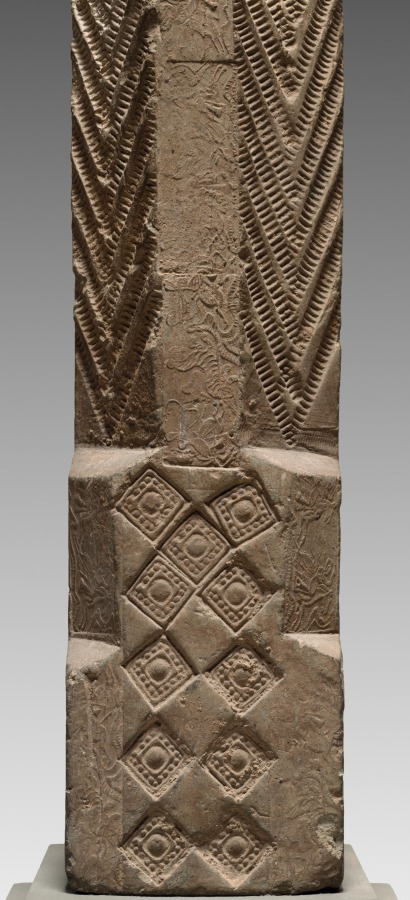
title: Hollow Tile: Column from Tomb-Chamber Doorway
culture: China, Han dynasty (202 BCE–220 CE)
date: 100–200 CE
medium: earthenware, die-stamped relief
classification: Ceramic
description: Striding tigers (top), racing horsemen (right column), and reverent officials (left column) are stamped into the surface of this underground portal to a tomb. The doorway preserves in stone the post-and-lintel structure, a basic element of Chinese wooden architecture. By the first century CE, a revolution in Chinese tomb construction and furnishing had taken place. Tombs lined with decorated bricks and tiles replace the earlier tombs constructed with only rammed-earth walls. Ceramic surrogates or models of stoves, houses, servants, and pets filled these more durable chambers, symbolically extending the creature comforts of this world into the world after death.